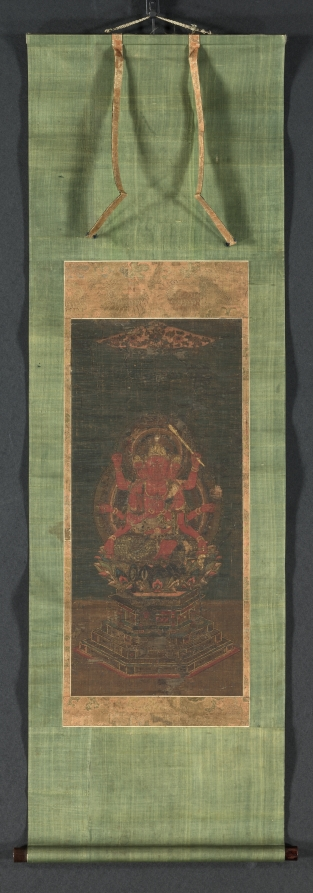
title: Wisdom King of Passion (Aizen Myōō)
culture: Japan, Muromachi period (1392–1573)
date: 1500s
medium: hanging scroll; color on silk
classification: Painting